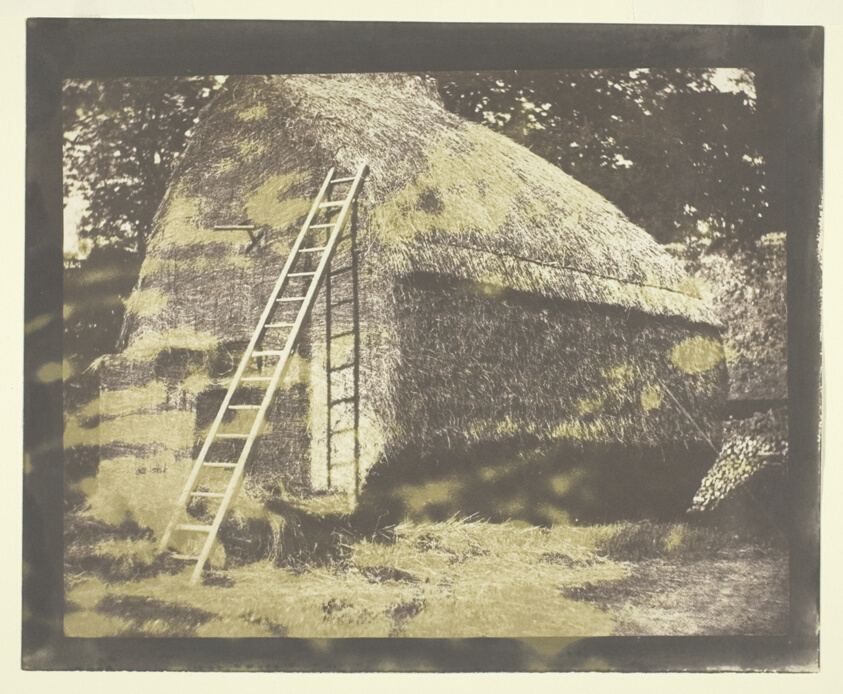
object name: Photograph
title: The Haystack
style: 19th century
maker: William Henry Fox Talbot (English, 1800–1877)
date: April 1844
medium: Salted paper print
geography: England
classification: salted paper print; photographic process; photography; photograph